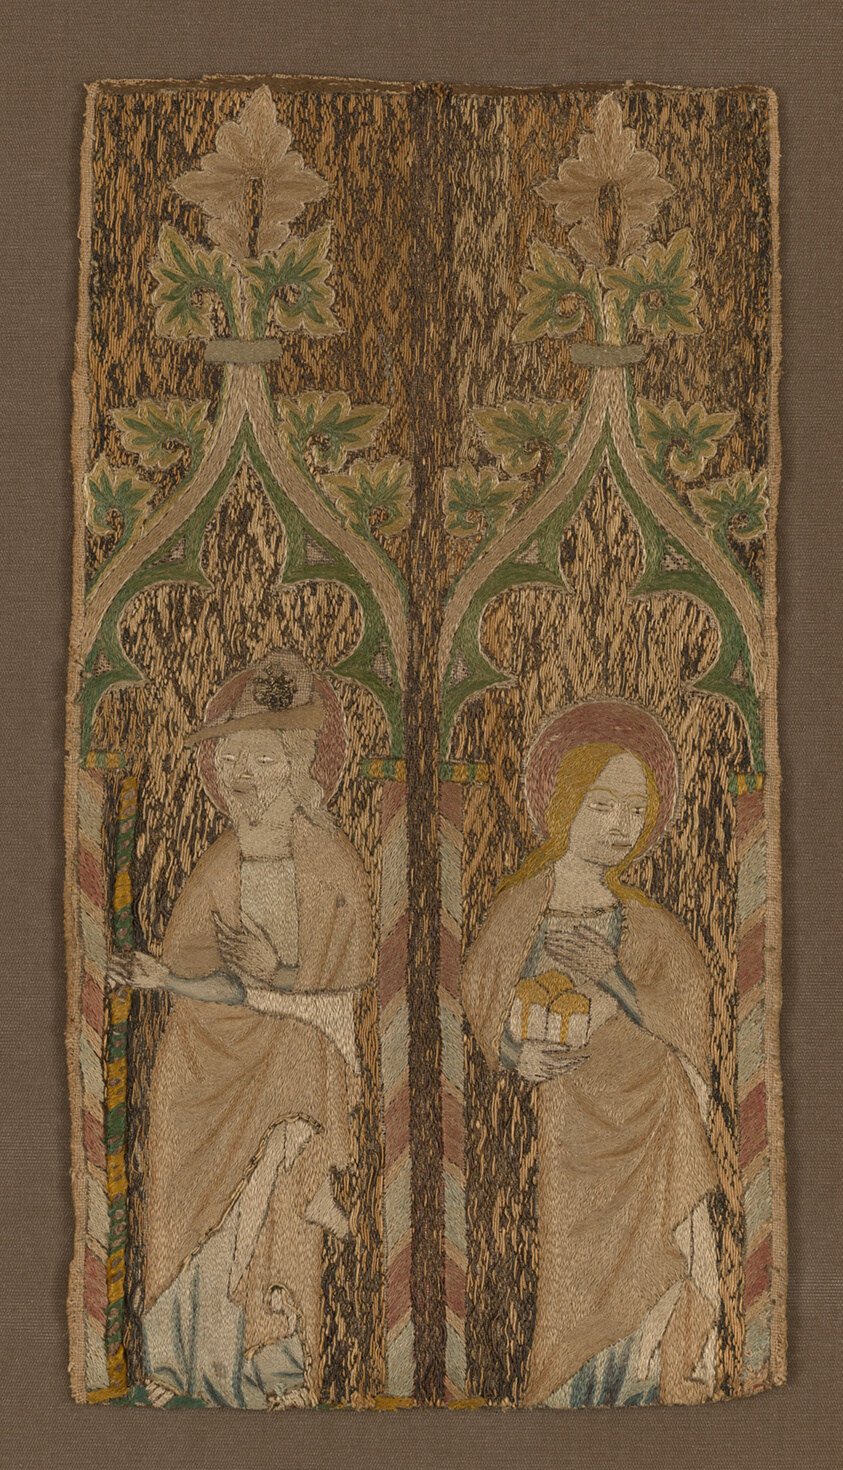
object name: Textile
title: Fragment from an Orphrey Band Showing St. Barbara and St. James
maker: England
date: 1350/1400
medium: Linen, plain weave; underlaid with linen, plain weave; embroidered with silk and gilt-metal-strip-wrapped silk in satin, padded satin, and split stitches; couching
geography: England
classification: textile; liturgical; needlework (visual works)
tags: vestments